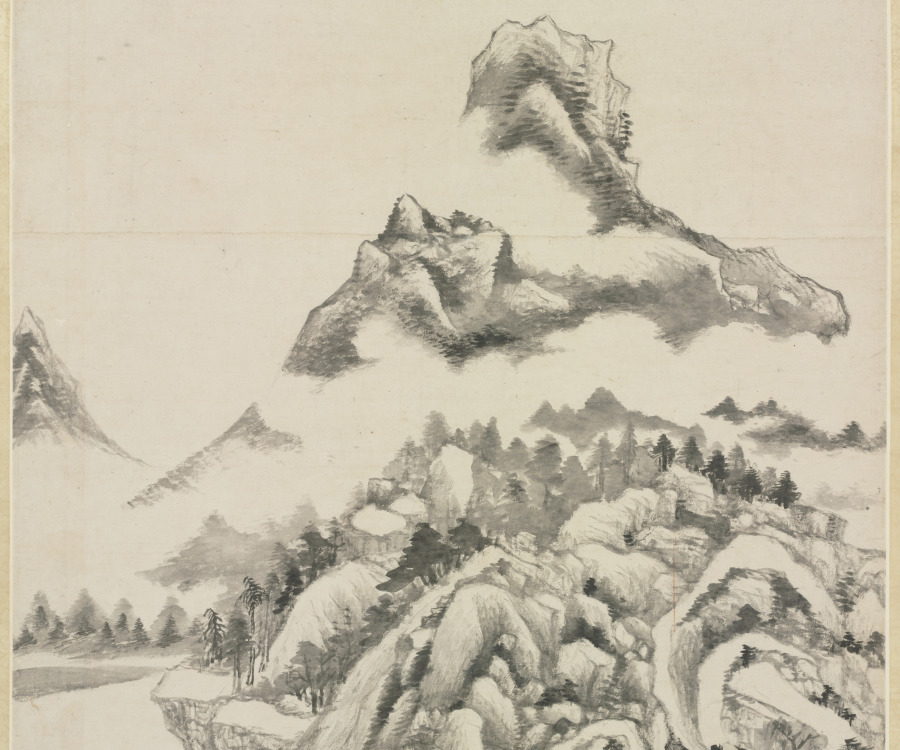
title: Mt. Qingbian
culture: China, Ming dynasty (1368–1644)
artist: Dong Qichang (Chinese, 1555–1636)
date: 1617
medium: hanging scroll, ink on paper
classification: Painting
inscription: Artist's first inscription, signature, and 2 seals: A painting of the Qingbian Mountains in the manner of Beiyuan [Dong Yuan]. In the summer of the dingsi year [1617], on the last day of the fifth month, [I] send this to my senior, Zhang Shenqi. Dong Xuanzai [seals] Zhi zhi hao ri jiang guan 知制誥日講官; Dong Qichang yin 董其昌印.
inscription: Artist's second inscription and signature: Piling irons for ten thousand feet guard the purple sky;/ Where puppies are seen on top of clouds, villages and marketplaces lie./ In the splendor of autumn, where is the most worthy spot to spend the day?/ Amid the rustling sounds of mountain streams, with a volume in hand, meditating on the Way [Dao]. Inscribed by Qichang. (trans. WKH/LYSL)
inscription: 4 additional seals: 3 of Li Enqing 李恩慶 (jinshi of 1833); 1 of Weng Wan-go 翁萬戈 (b. 1918).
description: Dong Qichang radically transforms the landscape composition into a purely abstract design. He organizes the mountain forms to achieve an overall sense of structure, activating the flow of energy (qi) and the momentum of force (shi) throughout the pictorial design. In his art, brush and ink assume life independent of the depicted forms, so that the painting can be appreciated for “the sheer marvels of brush and ink.”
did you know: Dong Qichang had visited the Bian Mountains, which are part of a low range located not far from Wuxing and Lake Tai in the southern province of Zhejiang.